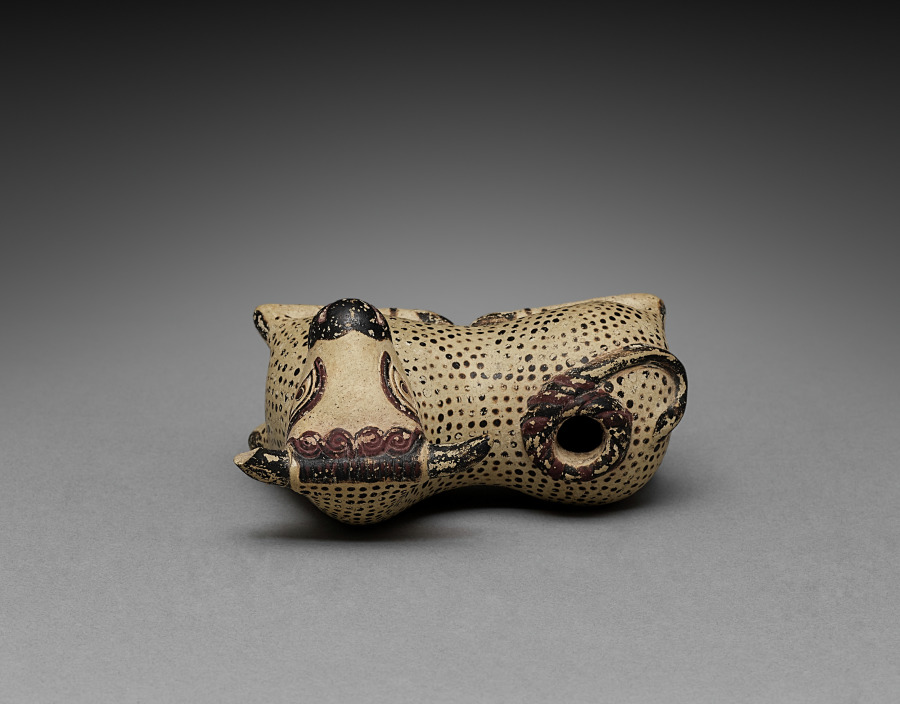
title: Oil Flask in the Shape of a Bull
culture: Greek, Corinthian or modern forgery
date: 600–575 BCE or 1900s CE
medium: ceramic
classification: Ceramic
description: This small bull-shaped flask is similar in form and painted decoration to a class of figure-shaped perfume vessels created during the late seventh and early sixth centuries BC in Greece and Italy (especially Corinth, Rhodes, and Etruria). The stippled body decoration characterizes such vases from multiple sites, while the light-colored clay and inconspicuous orifice placement are typical of Corinth. But no other reclining bulls are known among such vases (and only a few bullheads or upper bodies), raising questions about authenticity. A 1986 analysis determined that this object had been recently fired, and a 2020 clay analysis placed its origin in the Catalonia region of Spain, far from any known ancient production area for such flasks.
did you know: The curled tail masks a filling hole atop the back.